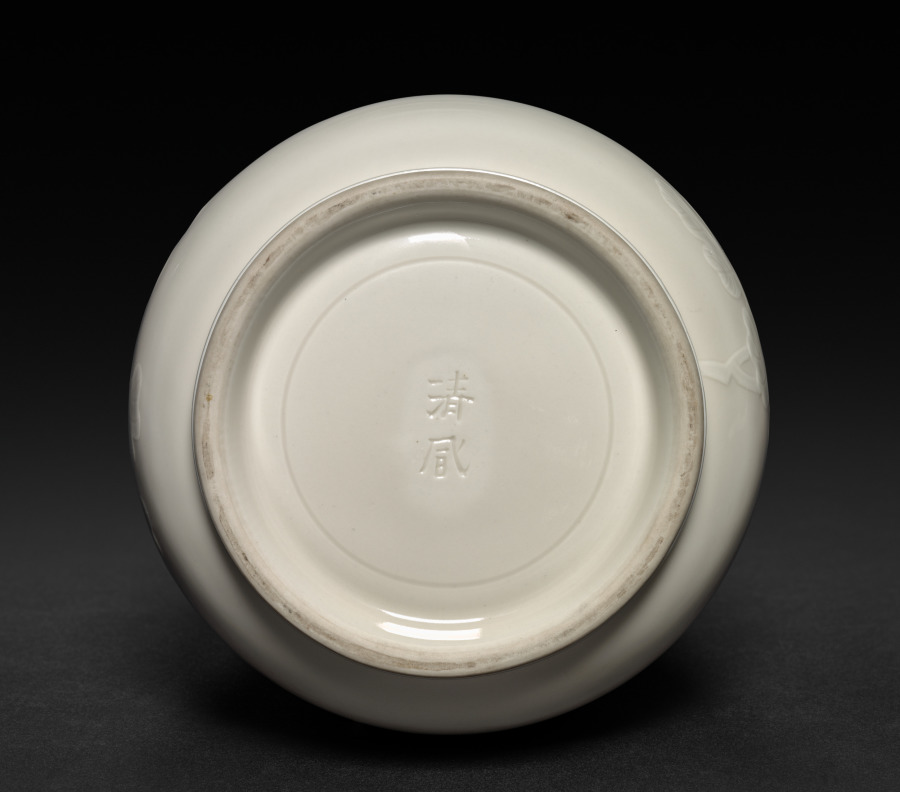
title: Flower Vase with Chrysanthemums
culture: Japan, Meiji period (1868–1912)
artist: Seifū Yohei IV (Japanese, 1872–1951)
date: 1914–46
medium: Porcelain with molded and carved design, underglaze pink, and cream glaze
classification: Ceramic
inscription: 清風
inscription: 清風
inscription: 清風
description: In creating this kanpakuji (or "bright-jewel white porcelain") vase, Yohei IV has applied his father’s signature creamy translucent glaze in combination with underglaze pink gradation surrounding motifs in low relief over an ivory clay body. This method was used to achieve the creamy white of the stalks, leaves, buds, and flowers of the elaborate design of chrysanthemum flowers in diverse stages of bloom.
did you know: The ivory and pink vase by Yohei IV show his father’s “bright-jewel white porcelain” technique.